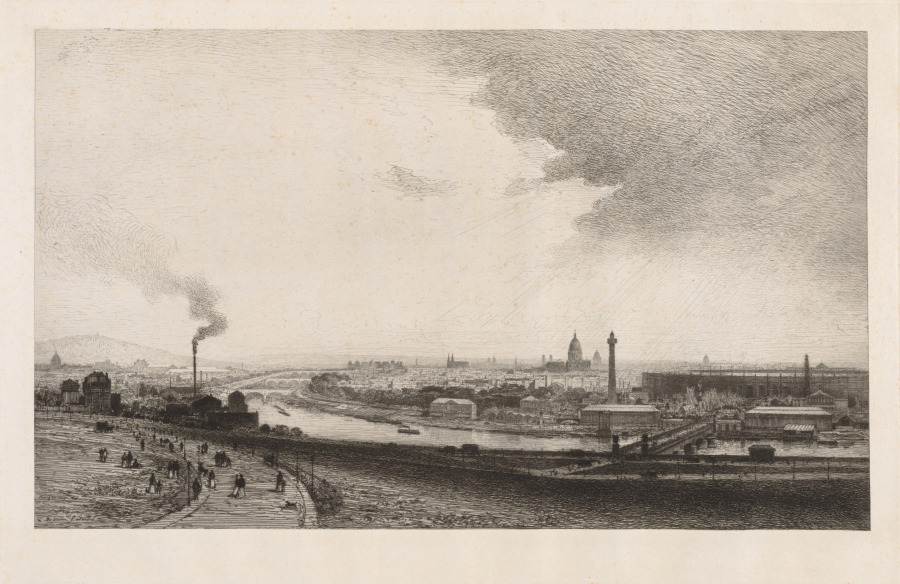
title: Paris in 1867, View from the Trocadero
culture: France, 19th century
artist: Maxime Lalanne (French, 1827–1886)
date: 1867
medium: etching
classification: Print